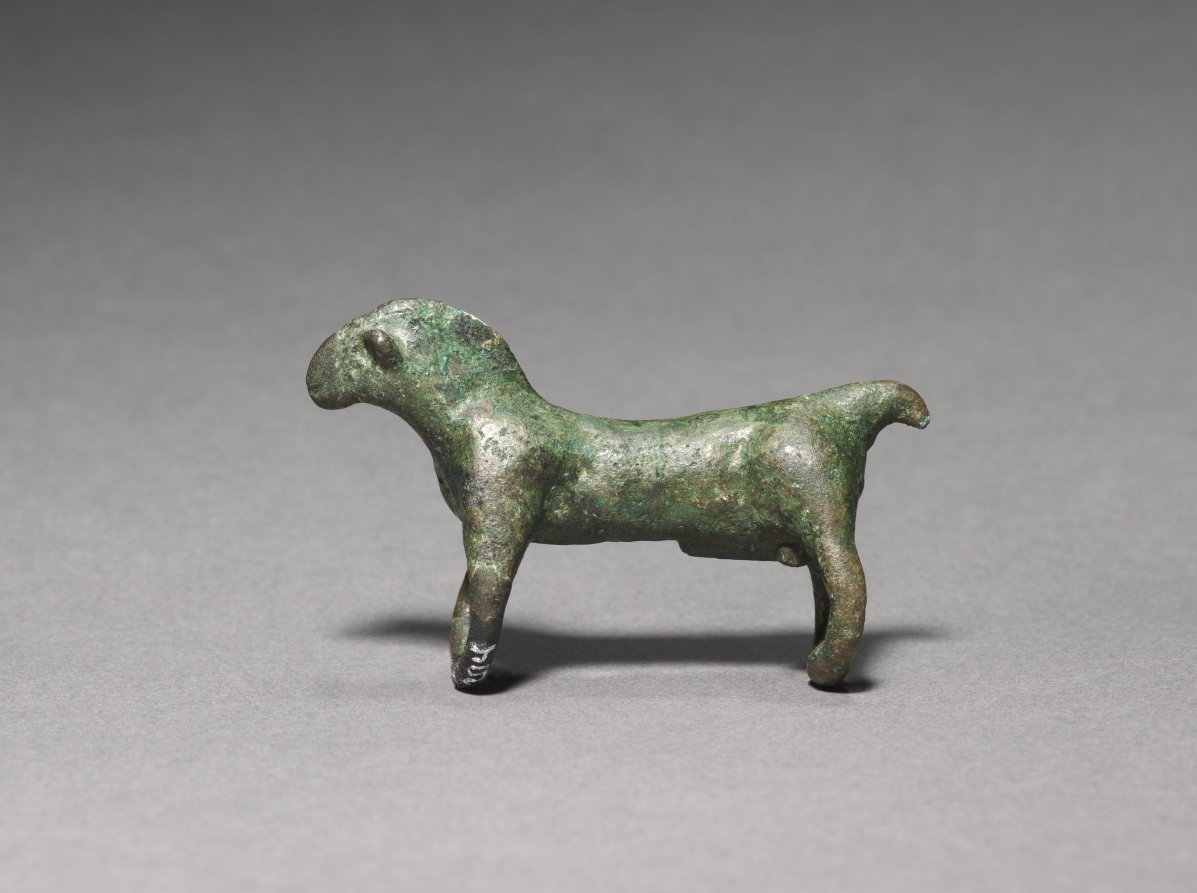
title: Horse Figurine with Looped Legs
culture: Northern Greece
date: mid-600s BCE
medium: bronze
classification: Metalwork